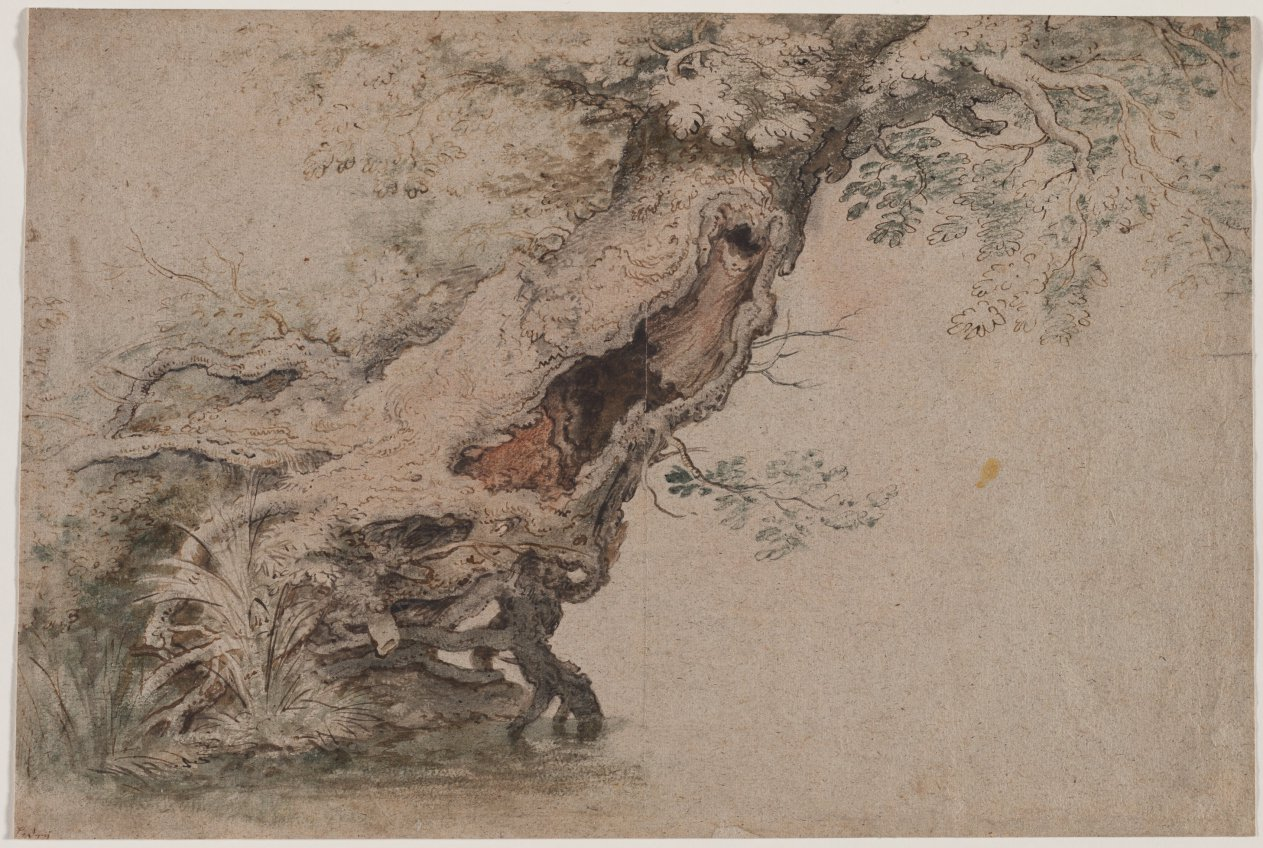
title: Hollow Tree, after Roelant Savery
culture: Netherlands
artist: Lambert Doomer (Dutch, 1623–1700)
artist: copy after Roelant Savery (Flemish, 1576–1639)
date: after 1670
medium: pen and black and brown ink, black chalk, and brush and green, brown, and orange wash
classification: Drawing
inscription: lower left, in brown ink: Saverij ; VERSO, upper center, in graphite: oblong ; lower left, in graphite: [illegible, partially erased] ; lower left, in graphite: Roland Savery 1576-1639 / (pupil of his brother Jan Savery ; lower center, in graphite: [illegible] / clip 1/2" left 1 1/2" [r]ight ; ON FRAGMENT OF OLD BACKING (now removed), on a seperately applied piece of paper, printed in black ink: MATH[IAS K]OMAR [cropped] / WORKS OF ART / Q840 [inscribed in black ink] / NEW YORK ; in black ink: Roland Savery / 1576-1639 / Ex. Coll. Dr. Ginsburg (L. 1145) / Reitlinger ; in graphite: Lugt. Supplt 2274a ; ON ANOTHER FRAGMENT, in graphite: R. Savery